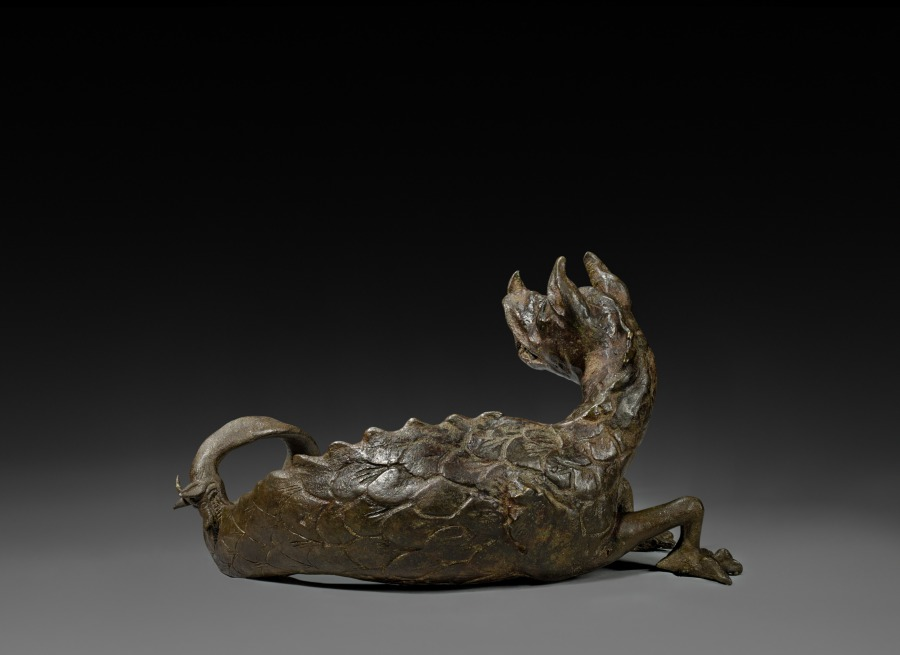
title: Dragon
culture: Italy, 18th century or later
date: 1700s or later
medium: bronze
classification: Sculpture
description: This figure was probably originally meant to serve as the decorative foundation to a larger object such as a casket or urn. In transition from decorative motif to independent work of art, the nether half may have been an addition, evidenced by the seam along its torso.